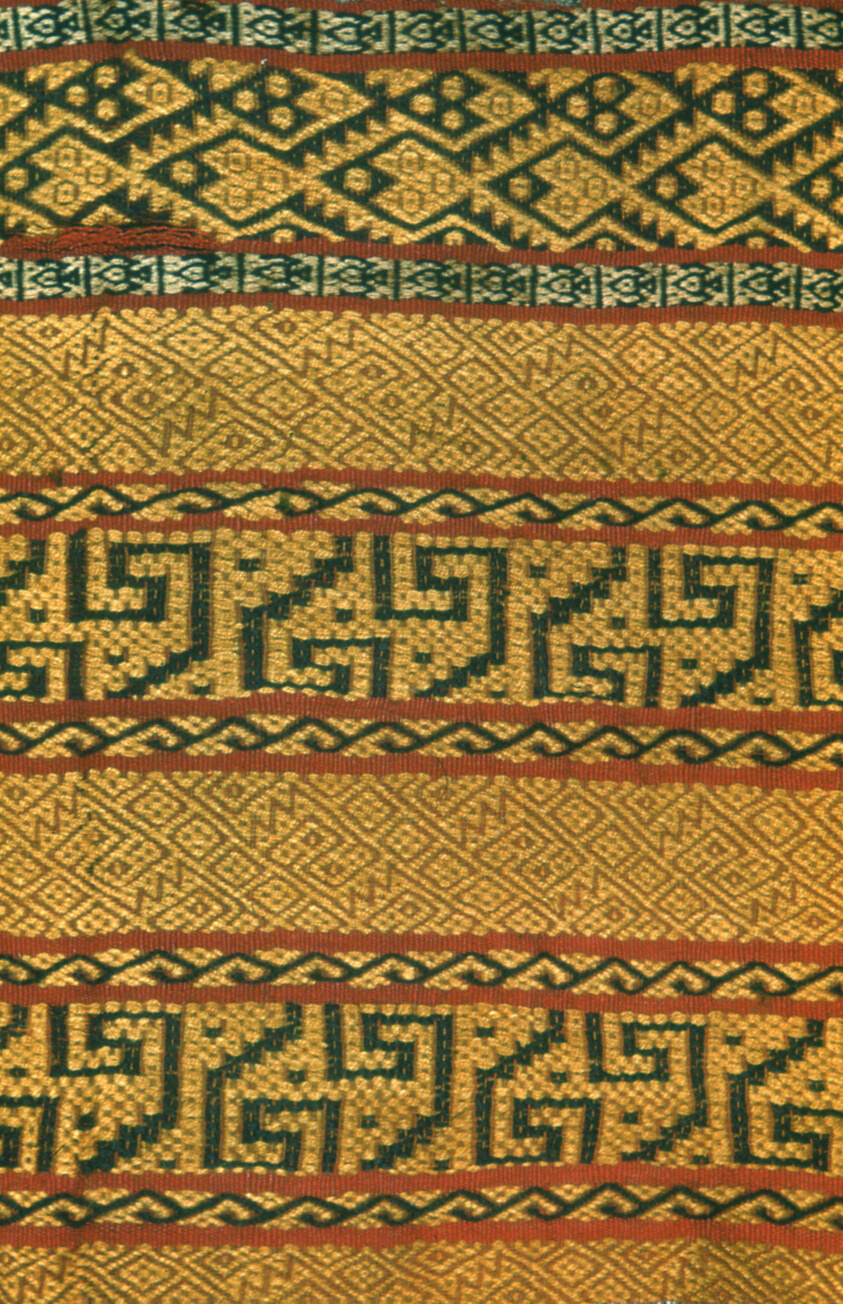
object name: Textile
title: Fragments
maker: Possibly central or south coast, Peru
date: A.D. 1000/1476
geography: Peru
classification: textile; weaving